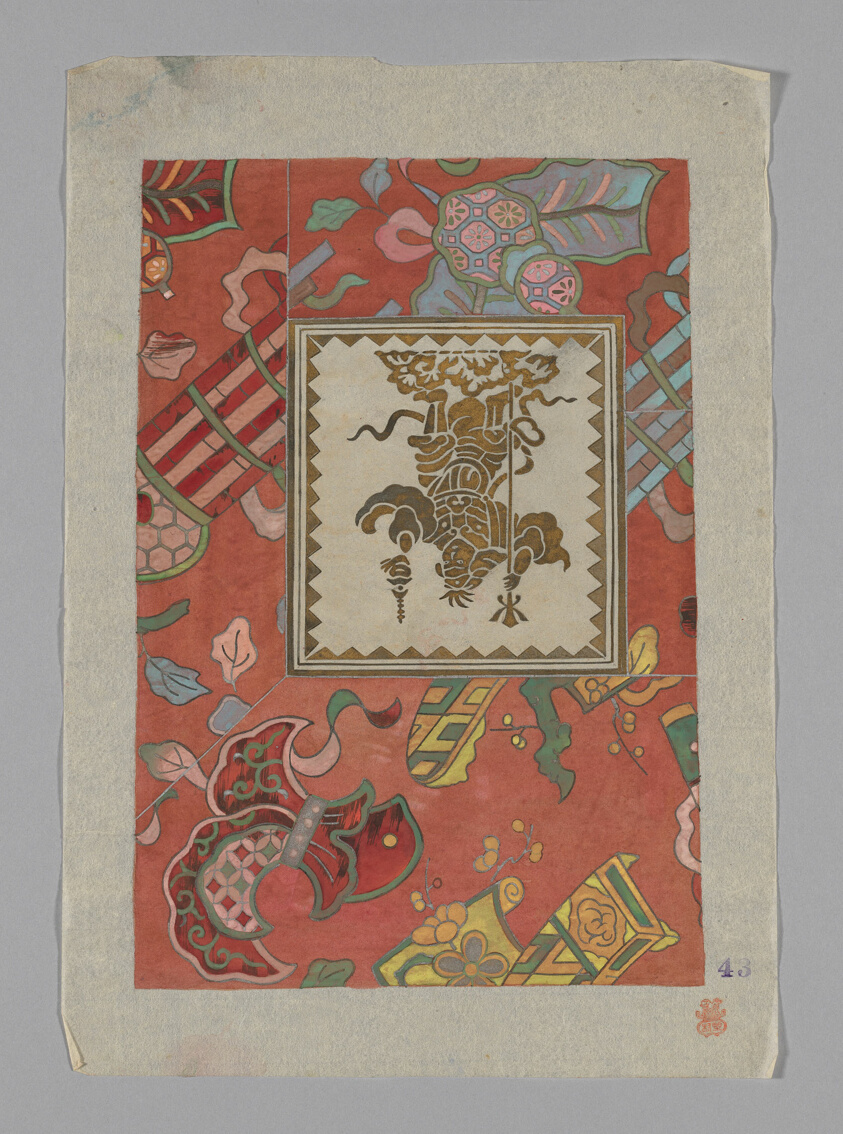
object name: Drawing and Watercolor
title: Design on Paper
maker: Japan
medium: Paper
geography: Japan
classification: textile; accessory - paper design; watercolor; paper